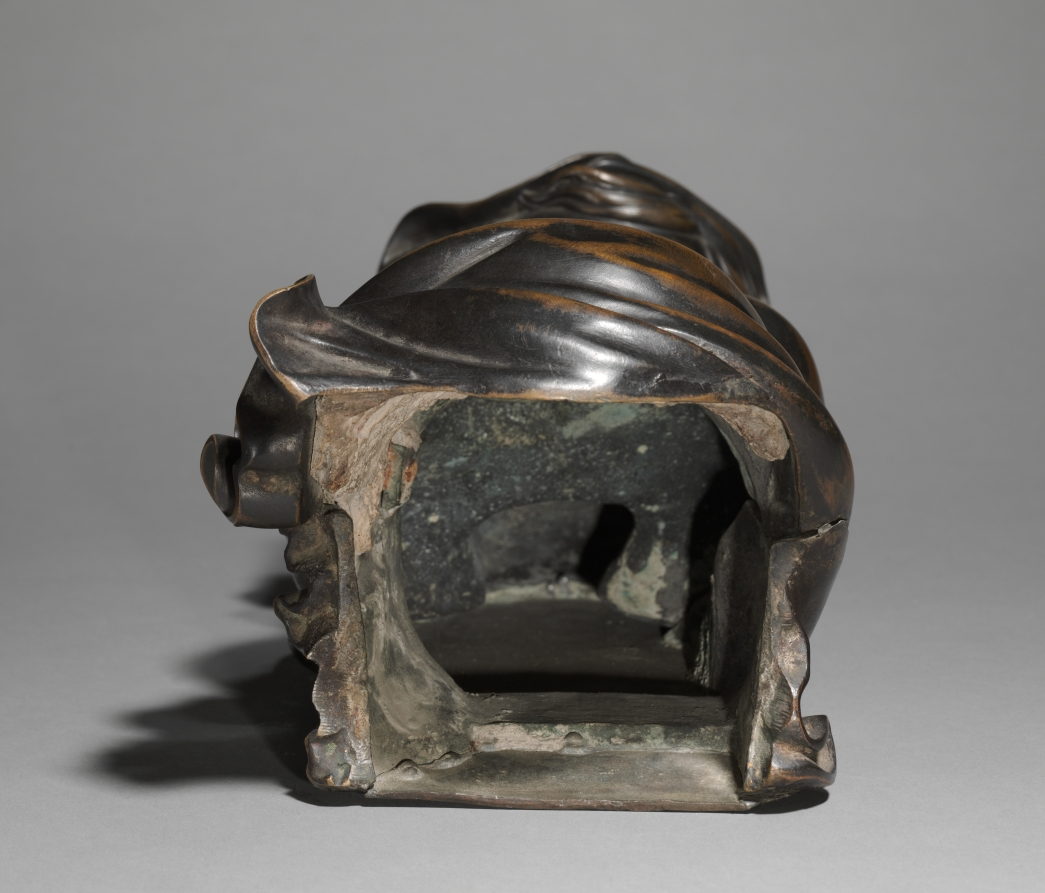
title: Winter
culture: France, 19th century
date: 1800s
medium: bronze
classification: Sculpture